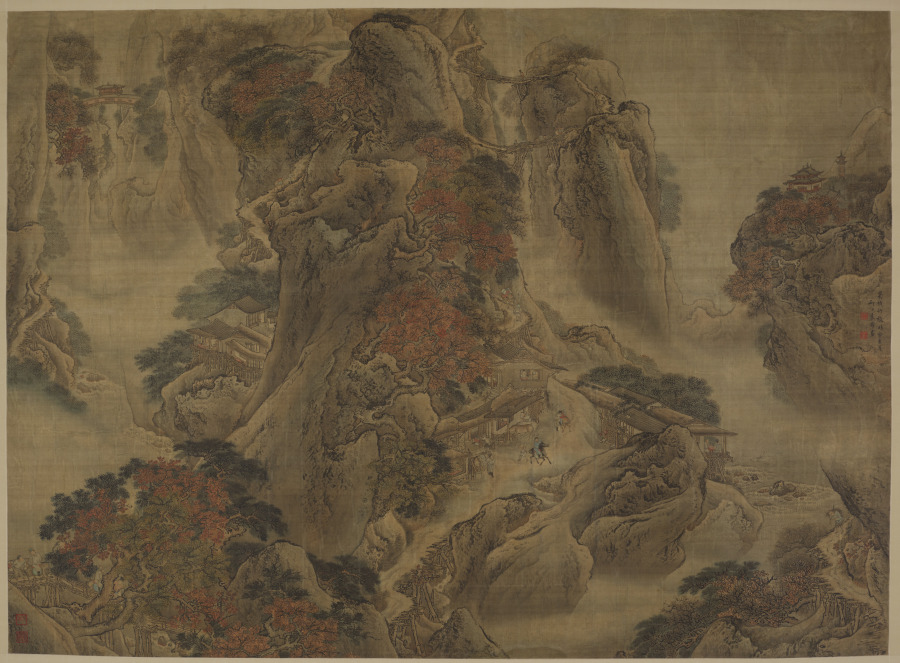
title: Road to Shu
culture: China, Qing dynasty (1644–1911), Qianlong reign (1736–95)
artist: Yuan Yao (Chinese, active mid-1700s)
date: 1743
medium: Hanging scroll; ink and color on silk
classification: Painting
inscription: artist's seals: yuan yao shi yin 袁耀 之印, zhao dao shi 昭道 氏 two collector’s seals: jin ju and illegible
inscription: Shu han xinglü //shi guihai xia //Hanshang Yuan Yao hua// 蜀椷行旅时癸亥夏- 邗上 袁耀 画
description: Few works by the Yuan workshops in Yangzhou present a continuous composition of such monumental scale as this hanging scroll. Road to Shu (in Sichuan province) depicts the trade of goods over long distances and through mountainous terrain. Busy travelers lead mules over footbridges, mountain paths wind along steep slopes, and soaring bridges connect peaks divided by deep gorges. The Yuan studios produced paintings to decorate the residences of wealthy Yangzhou salt merchants and princely palaces. The title Road to Shu refers to the historical drama of the flight of Tang emperor Xuanzong (reigned 712–56) to Sichuan in the aftermath of the An Lushan Rebellion (755–63). At the same time, the scenery alludes to Anhui, the mountainous native country of many of the salt merchants and their trade routes in northern parts of the empire.